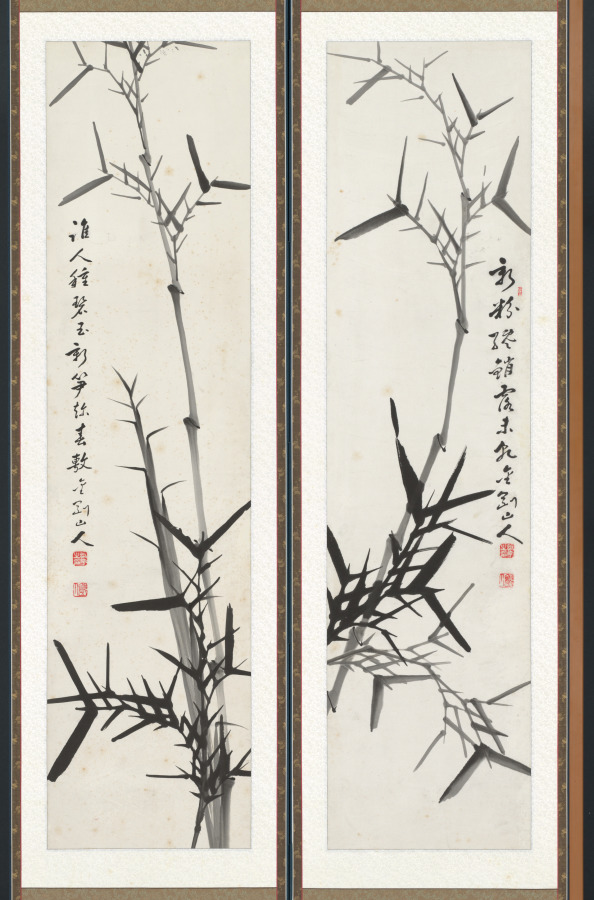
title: Bamboos in Wind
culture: Korea, Japanese colonial period (1910−1945)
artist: Kim Jin-woo (Korean, 1883–1950)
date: 1934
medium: Ten-panel folding screen; ink on paper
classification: Painting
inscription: Two chops stamped on each panel: 振宇之印 (Jinwoo’s Seal); 金剛山人 (Diamond Mountain Man)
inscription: Inscription written on the far-left panel: 甲戌流??寫於竹林堂金剛山人振宇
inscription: Inscription written on the 8th panel: 五百間淸風金剛山人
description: Active during the Japanese colonial period in Korea (1910–45), the artist Jin-woo Kim earned his artistic reputation for his expressive renditions of bamboo swaying in a strong wind. His piercing bamboo shoots are often compared to an iron spear, and their sharp leaves to a knife. It is believed that he deliberately emphasized sharpness in his brushstrokes to express his strong resistance against Japanese colonial oppression.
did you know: The artist’s prolific artistic production were a major part of fundraising efforts to support resistance activities for Korea’s independence.